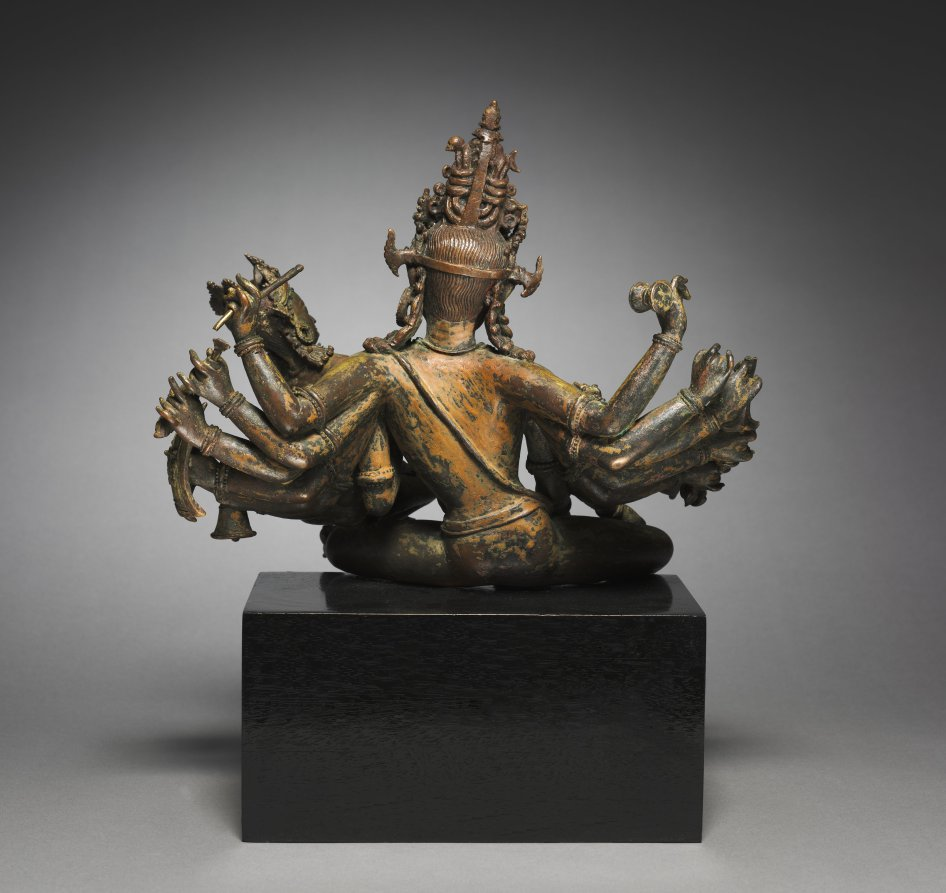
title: Kubjika–Navatman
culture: Nepal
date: 1300s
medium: Gilt bronze with semiprecious stones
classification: Sculpture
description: The tantric Hindu Goddess Kubjika sits on the bent knee of her male consort, Navatman, a form of Shiva. Tantric practitioners use the recitation of mantras, which are powerful formulas or spells, in order to achieve the favor and power of the goddess. In this sculpture, the male figure personifies the Navatman Mantra by means of which devotees can access the goddess Kubjika. Kubjika’s name translates to “the crooked one,” and she is often shown as an elderly woman with a curved back. Here, however, she is depicted as a youthful contortionist.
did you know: The smaller figure, the goddess Kubjika, is the more powerful of the pair.